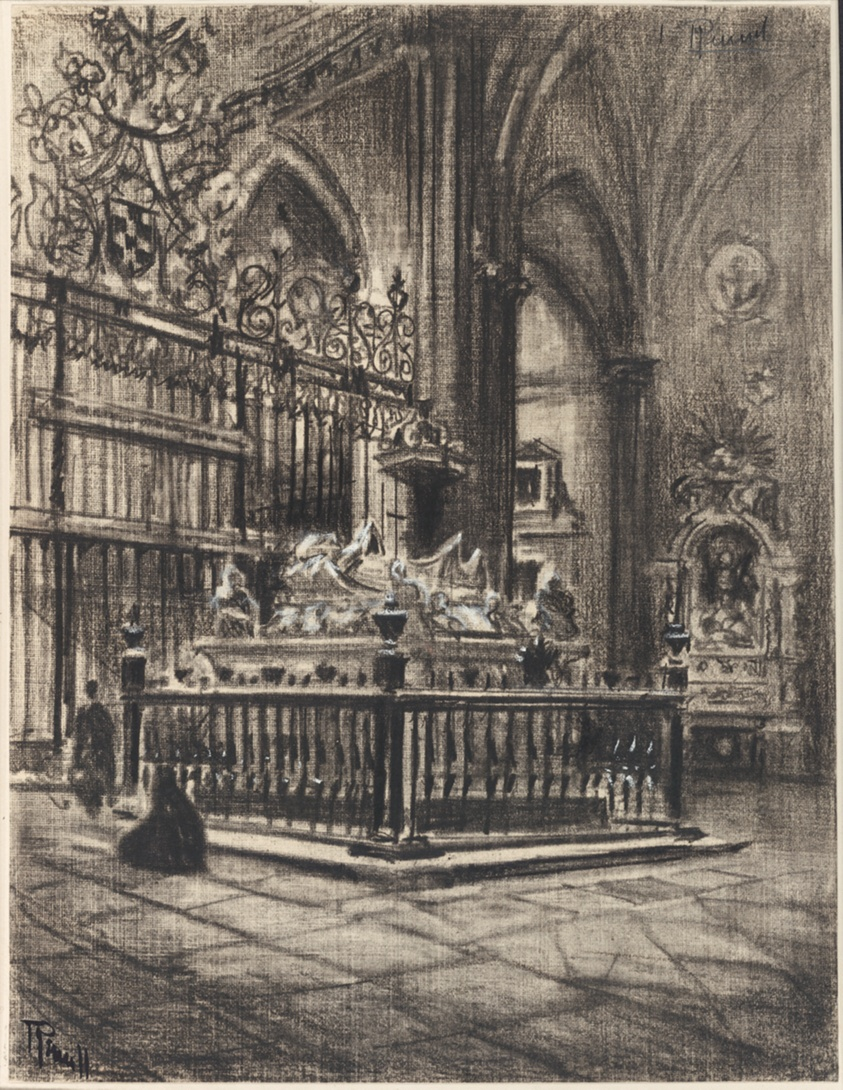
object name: Drawing and Watercolor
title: Alcalá, "The Gorgeous Sarcophagus" of Ximenez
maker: Joseph Pennell (American, 1857-1926)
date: c. 1903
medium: Oiled charcoal with stumping and erasing, heightened with touches of white chalk, on cream wove paper, perimeter mounted on off-white wood pulp laminate board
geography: United States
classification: charcoal; drawings (visual works); prints and drawing